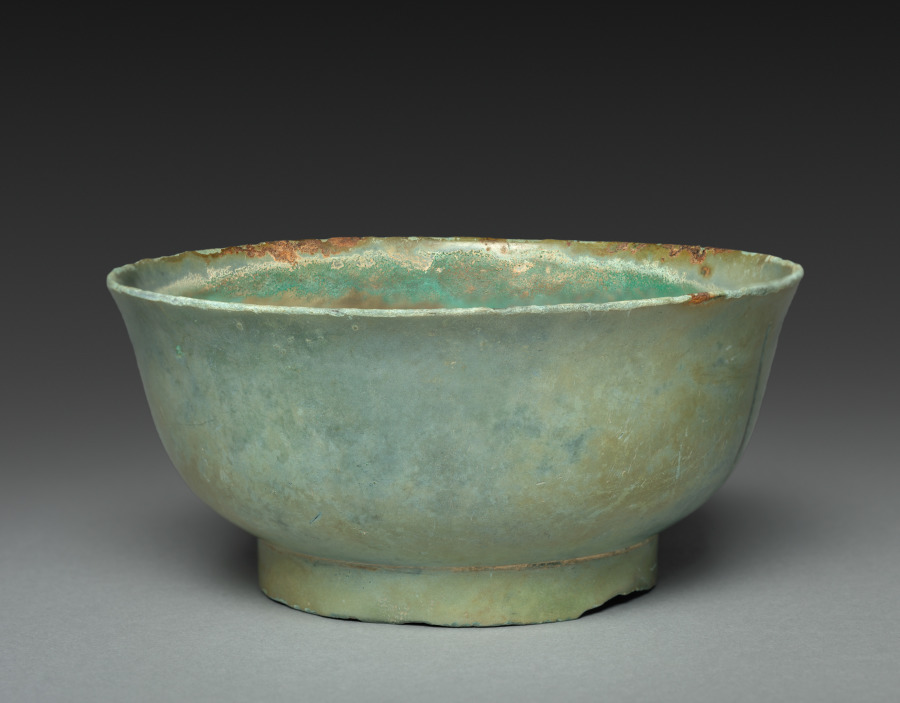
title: Bowl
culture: Korea, Joseon dynasty (1392–1910)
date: 1700s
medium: bronze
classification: Metalwork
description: In ancestor veneration rituals, deceased parents or ancestors are sanctified as spirits who are believed to oversee their descendants. Three times a year, once at the lunar new year, once at the person’s death date, and once at the time of the mid-autumn festival, food would be placed on the table for the ancestors, including fruits, rice, meat, and rice wine. During these ceremonies the worshippers’ attitude was as reverential toward the objects meant to embody the ancestors’ spirits as that toward a living parent. This cup may have been used for ancestral rituals to contain rice wine.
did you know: This bronze bowl may have been used in family rituals such as ancestral worship ceremonies in the Joseon period.